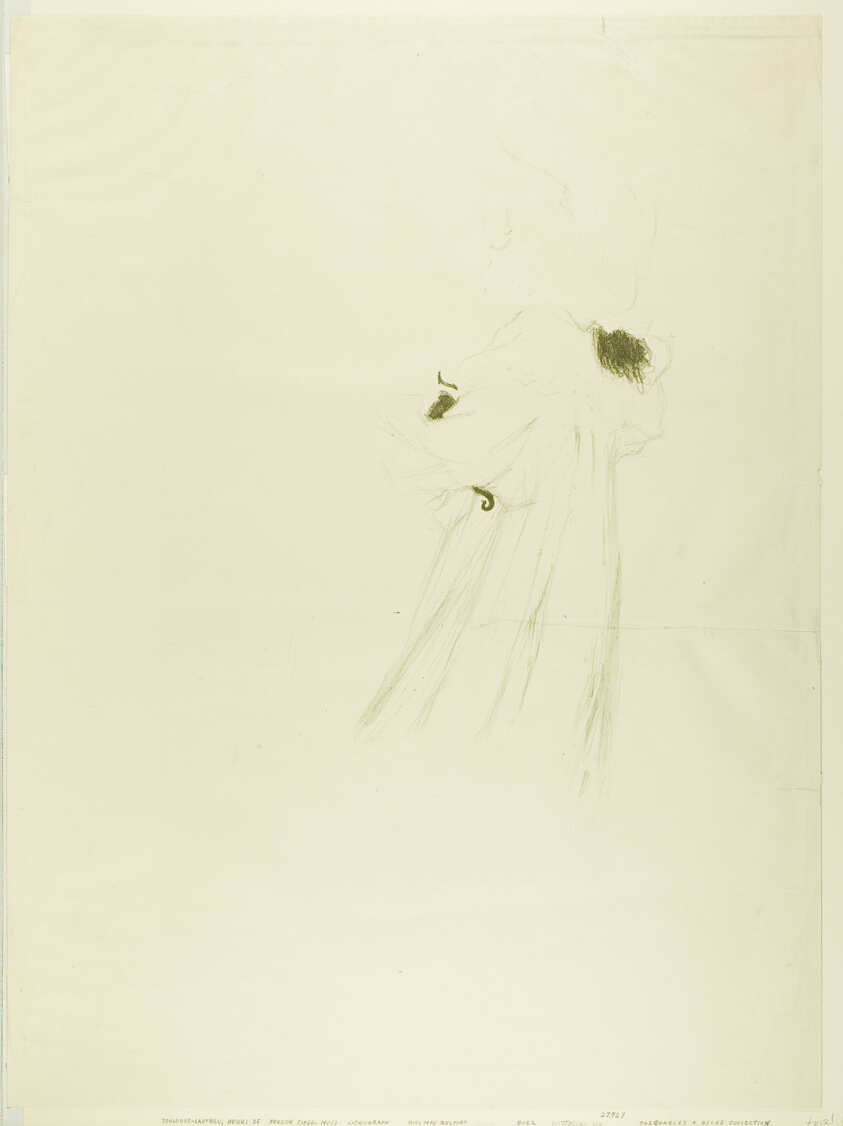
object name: Print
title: Miss May Belfort (large plate)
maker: Henri de Toulouse-Lautrec (French, 1864-1901)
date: 1895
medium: Color lithograph on cream wove paper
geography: France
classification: lithograph; print; prints and drawing